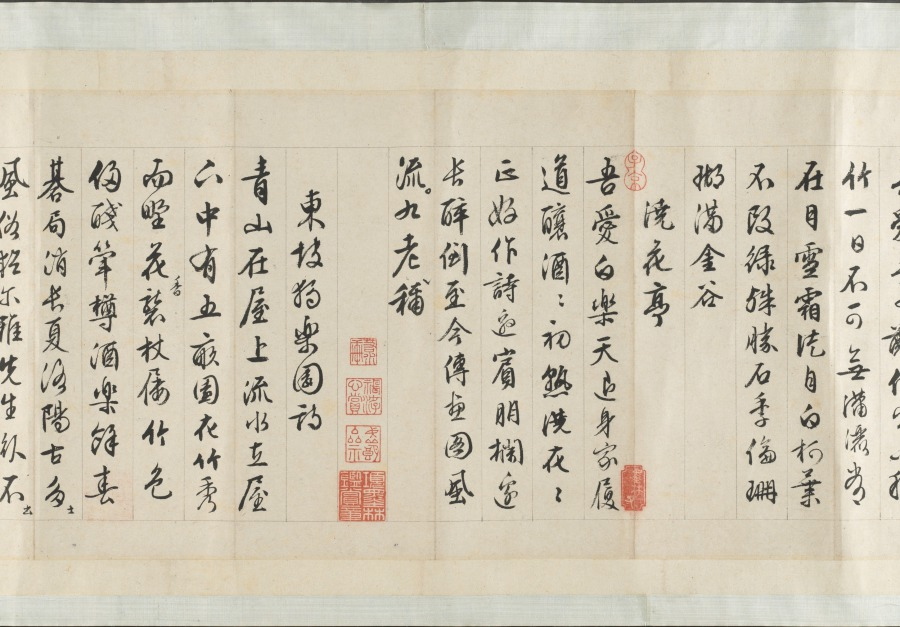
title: Garden for Solitary Enjoyment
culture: China, Ming dynasty (1368–1644)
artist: Qiu Ying (Chinese, 1494–1552)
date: 1515–52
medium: Handscroll; ink and light color on silk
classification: Painting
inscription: Accompanying text of an essay together with seven poems of Sima Guang (1019–1086) and one poem of Su Shi (1037–1101) written by Wen Zhengming (1470–1559) in 1558.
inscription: 2 colophons and 82 seals: 4 seals of Wen Zhengming 文徵明 (1470–1559); 59 seals of Xiang Yuanbian 項元汴 (1525–1590); 1 colophon, dated 1644, and 7 seals of Xiang Yukui 項禹揆 (c. late 1500s–1659); 1 colophon, dated 1880, and 2 seals of Weng Tonghe 翁同龢 (1830–1904); 2 seals of Ch'eng Chen-i (19th c.); 1 seal of Han Ch'ung (19th c.); 4 seals of Wan-go H. C. Weng 翁萬戈 (1918–2020); 3 seals unidentified.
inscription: Colophon by Xiang Yukui 項禹揆 (c. late 1500s–1659): The painting of The Garden for Self-enjoyment on the right by Shih-chou, Mr. Qiu [Qiu Ying] is in the style of Li Lung-mien. Its mood is peaceful, as if meeting the ancient gentlemen face to face among the brushes and silk; it lifts one above the sordid bustle of life. Formerly, my late father handed me this scroll which had only the painting without the written essay. I considered asking a good calligrapher to write the essay to add to it but was afraid that the quality of the writing would not match the painting. Several years later, I saw at a friend's house this essay and poems (of Ssu-ma Kuang] written by Hengshan [Wen Zhengming], once owned by my grandfather; so I spared no expense to obtain it. I rejoiced at this and said: "The divine swords are finally united. How things are pre-destined!" Now my friend Chang Kung-chao's technique for mounting [painting and calligraphy] is excellent. Therefore by daring to take them out and join them together, I can preserve this beautiful story of singular reunion. Xiang Yukui recorded at Hai-yeh-t'ang [hall] two days before New Year's Eve in the jiasheng year of the Chongzhen era [1644]. trans. LYSL/HK/WKH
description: Garden of Solitary Enjoyment refers to a site built in 1073 by the statesman Sima Guang (1019–1086) after he had retired to Luoyang, Henan province. Every spring, visitors would flock to his garden. Each of its seven structures references a historic figure. Sima wrote: I channel streams [like Du Mu], to water flowers [like Bai Juyi], or trim bamboo [like Wang Huizhi]. . . . I know of no joy between heaven and earth that could take its place. Qiu Ying’s painting, created after an 11th-century version of the same theme, must have appealed to garden owners of the Ming dynasty, since it became the template for numerous Suzhou workshop copies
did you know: Sima Guang completed his monumental survey of Chinese history, Zizhi tongjian, in the garden depicted in this painting.